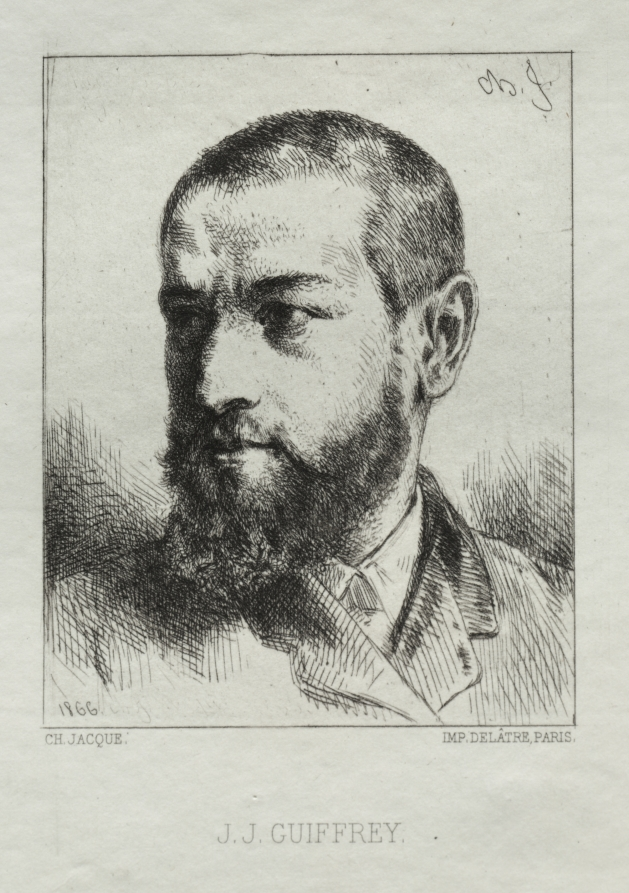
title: J. J. Guiffrey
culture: France, 19th century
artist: Charles-Émile Jacque (French, 1813–1894)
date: 1866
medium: etching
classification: Print